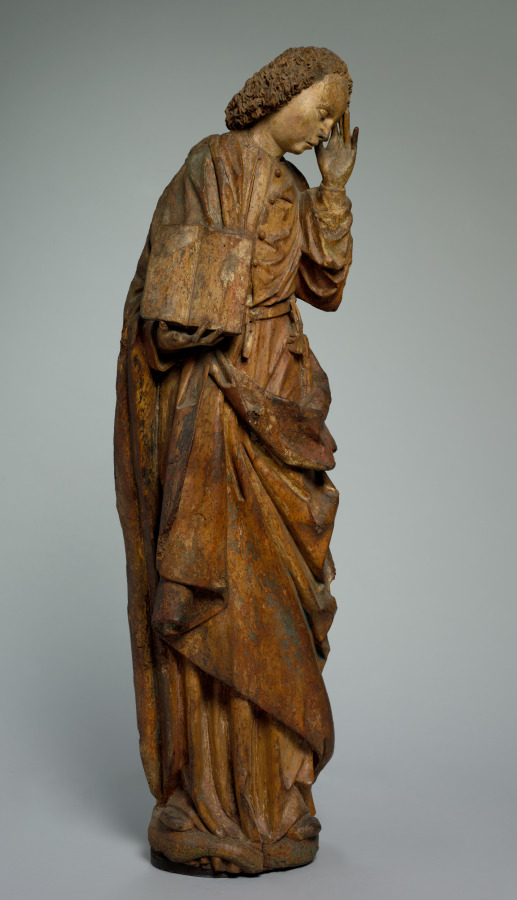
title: Saint John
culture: France, 15th century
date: 1450–1499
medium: wood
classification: Sculpture